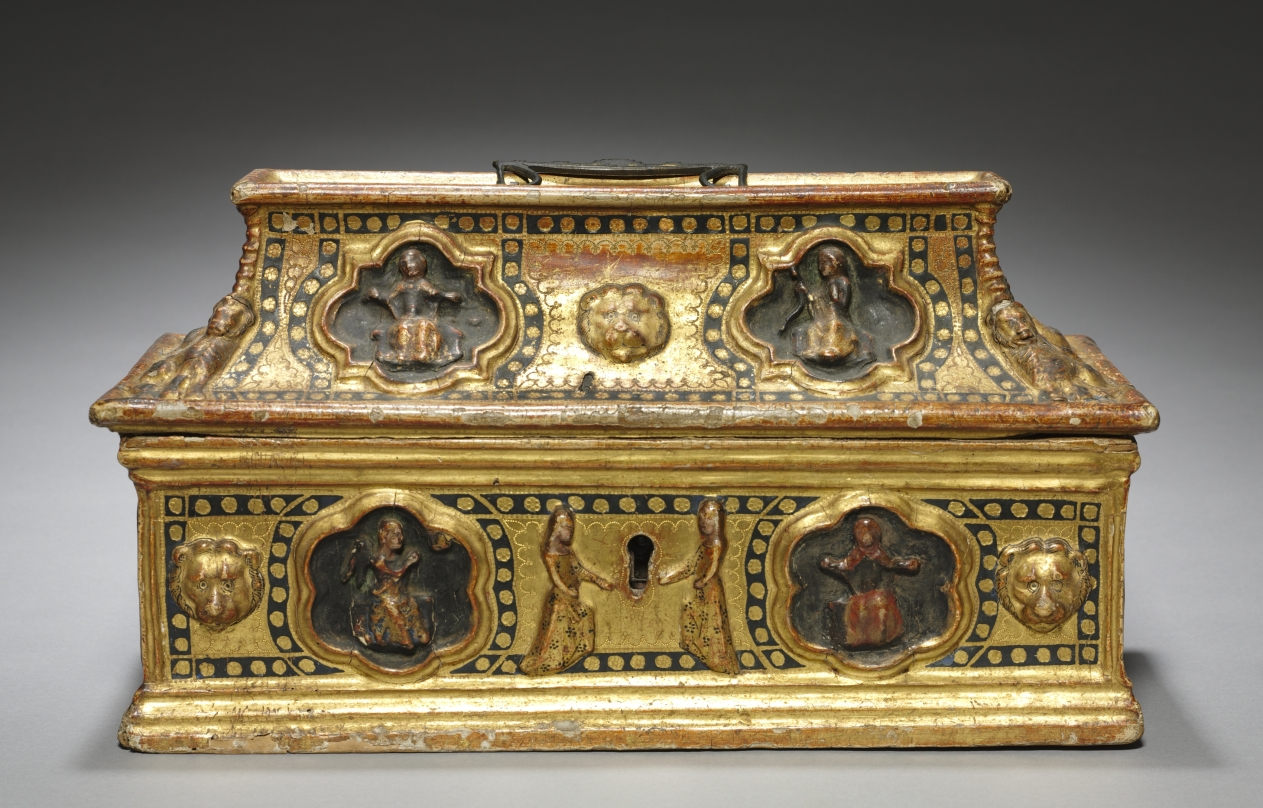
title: Casket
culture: Italy, Siena(?)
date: late 1300s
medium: painted and gilded gesso on wood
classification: Furniture and woodwork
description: This casket is one of only a few of its kind to survive in such a fine state of preservation. A variety of such caskets were used in wealthy homes to store jewelry, seals, mirrors, and combs. A keyhole lock is provided for security. Caskets like this were often highly decorated and given to women as gifts.